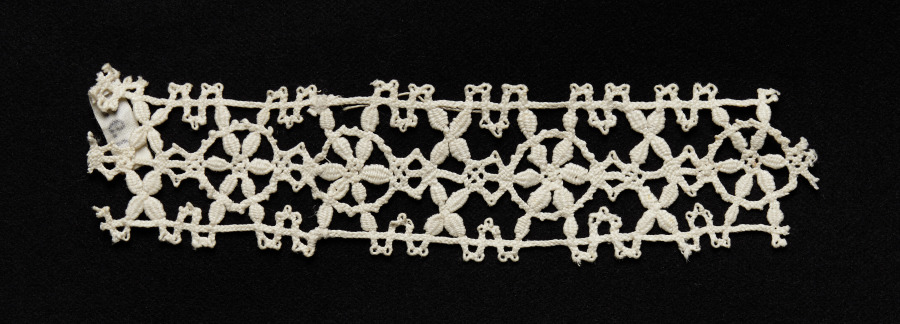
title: Lace Insertion (no selvage)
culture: Italy, Genoa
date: 1550–99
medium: Bobbin lace (needle lace design)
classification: Lace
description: This lace fragment represents a Genoese interpretation of Venetian lace designs of the 1500s.